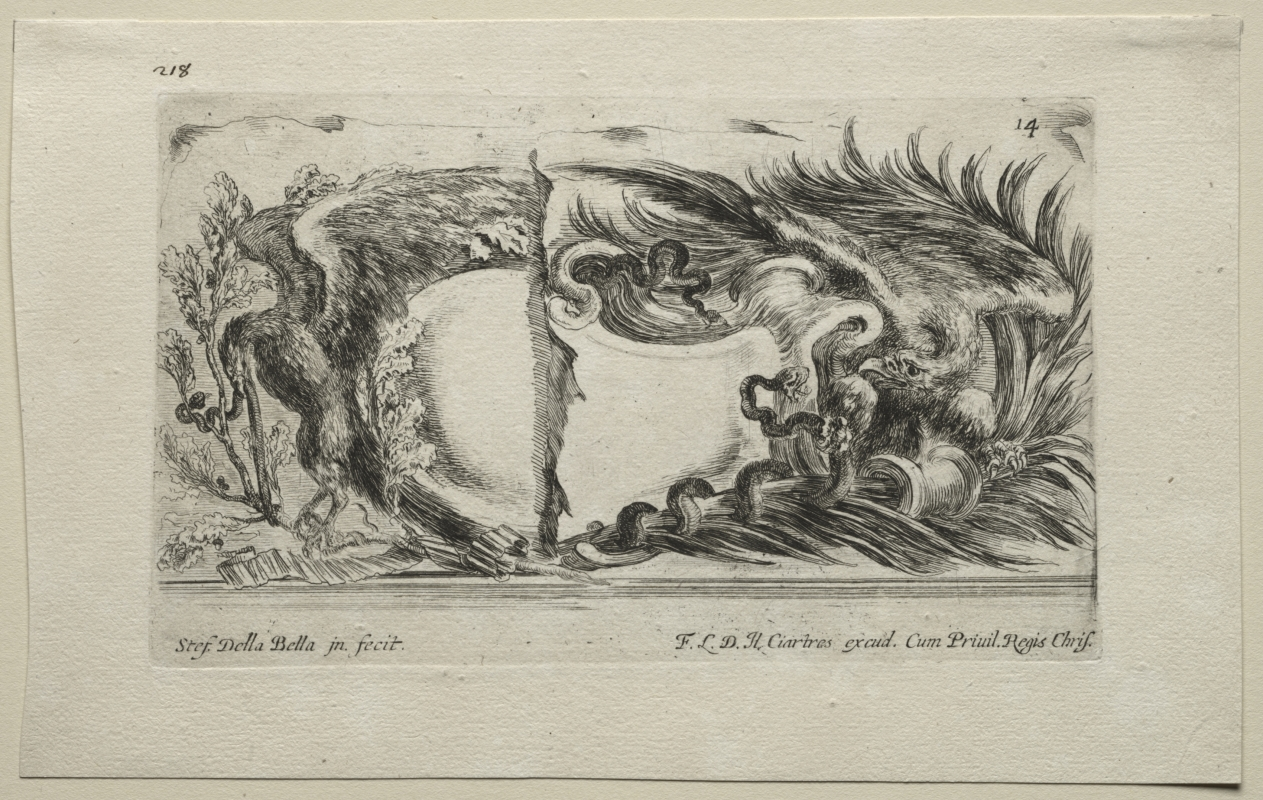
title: Collection of Various Caprices and New Designs of Cartouches and Ornaments: No 14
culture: Italy, 17th century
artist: Stefano Della Bella (Italian, 1610–1664)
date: 1646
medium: etching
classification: Print